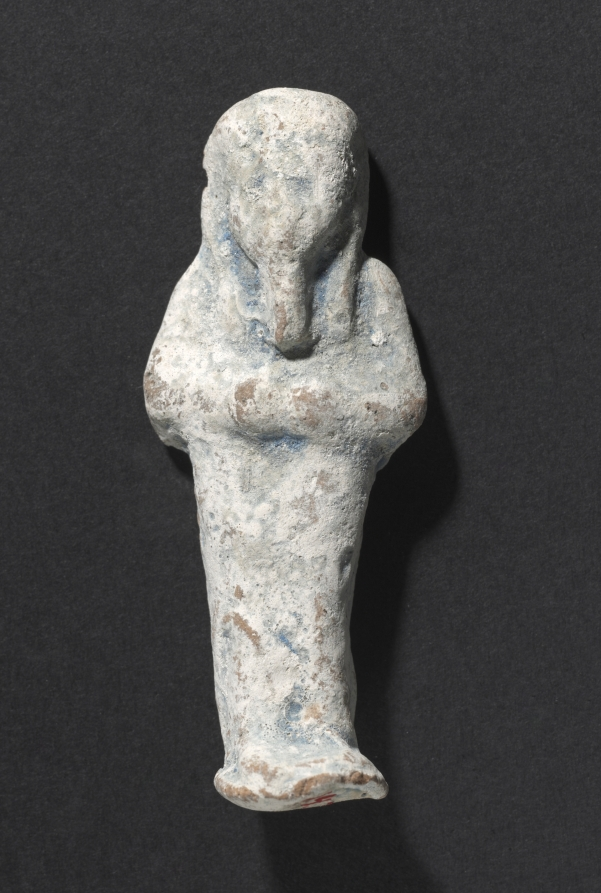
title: Shawabty of Ditamenpaankh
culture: Egypt, Late period (715–332 BCE), Dynasty 25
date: 715–656 BCE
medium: terracotta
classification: Funerary Equipment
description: High demand for shawabtys in the Late Period, a time when as many as 400 or more shawabtys were placed in the tomb with the deceased, gave rise to a specialized container for storing them: the shawabty box. This example is inscribed for the lady of the house, Ditamenpaankh, and was probably one of a pair originally made for her. The single-masted boat on the box's lid is perhaps an allusion to the pilgrimage of the deceased to the holy city of Abydos, the cult city of Osiris, king of the dead. The shawabtys inside are crude, mass-produced examples cast in an open mold. Made of terracotta, their blue paint imitates more costly shawabtys made of faience. As for the shawabty spell, it has been removed from its traditional location on the shawabty's front and relocated onto the sides of box, where it needed only to be written once, thus expediting production.